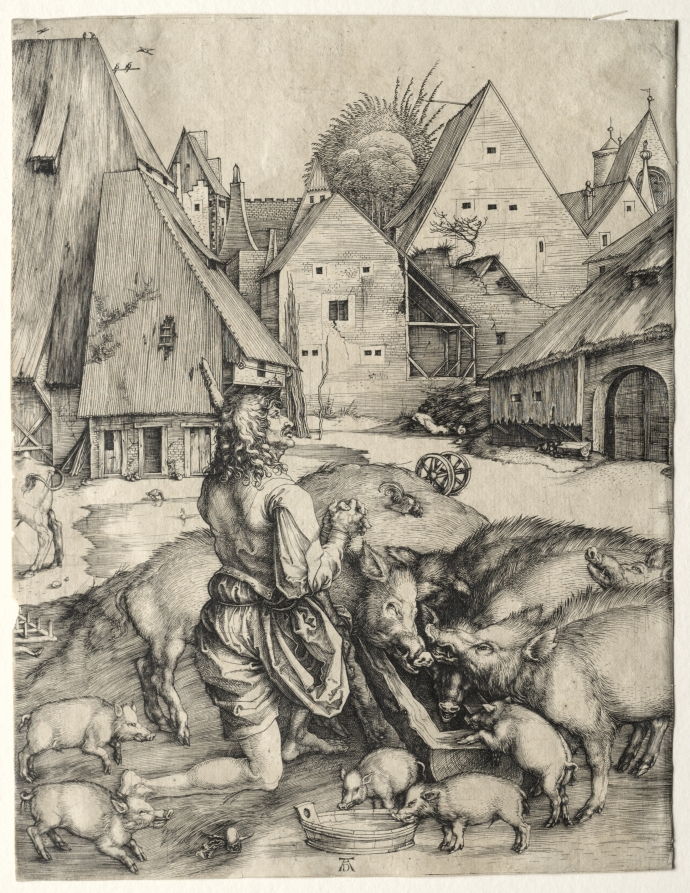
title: The Prodigal Son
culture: Germany, late 15th Century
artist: Albrecht Dürer (German, 1471–1528)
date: c. 1497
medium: engraving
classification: Print